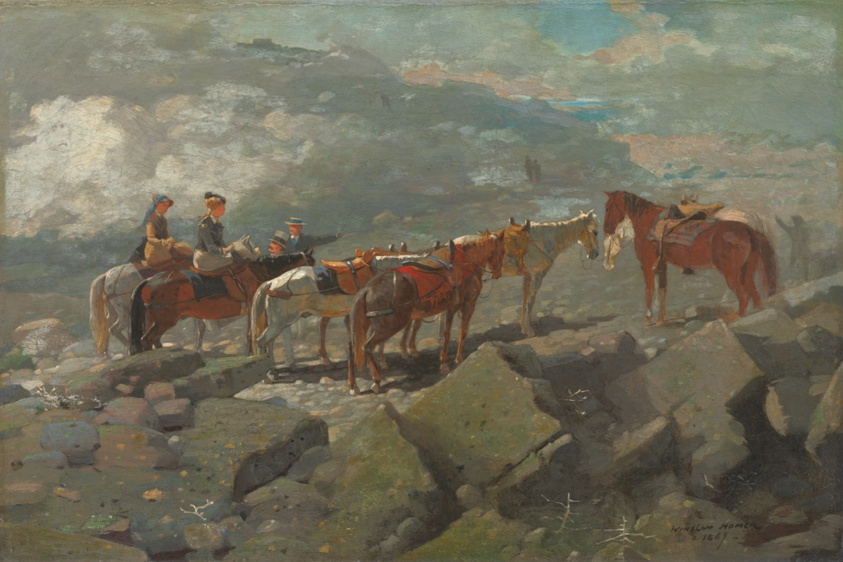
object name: Painting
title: Mount Washington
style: Impressionism, Realism, Modernism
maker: Winslow Homer (American, 1836–1910)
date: 1869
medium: Oil on canvas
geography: New Hampshire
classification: painting; american arts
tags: landscapes, leisure, women, weather/seasons, men, transportation, insects, animals